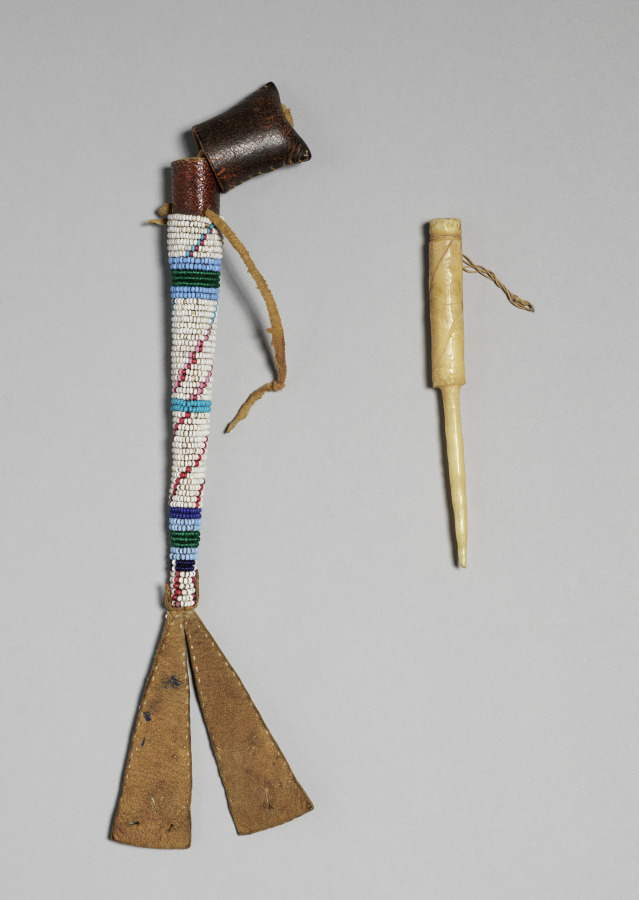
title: Bone Awl with Beaded Case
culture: America, Native North American, Gaigwu (Kiowa), late 19th century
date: late 1800s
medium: bone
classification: Implements